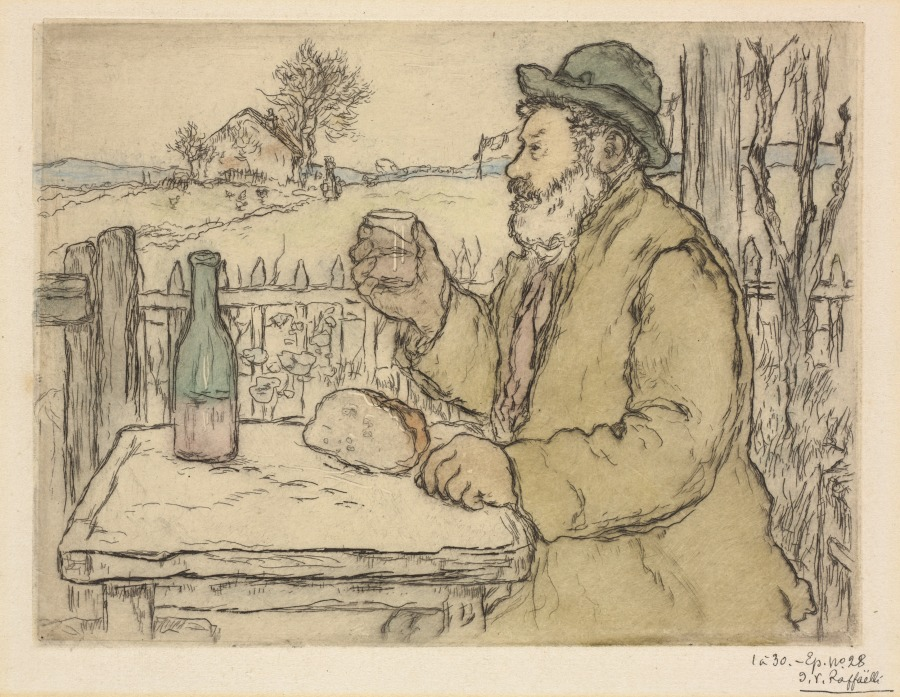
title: A Votre Santé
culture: France, 19th century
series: Types de petits Gens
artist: Jean-François Raffaëlli (French, 1850–1924)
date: 1894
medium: etching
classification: Print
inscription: lower right margin, in pen and black ink: 1 à 30.-Ep. no. 28 / J. F. Raffaëlli